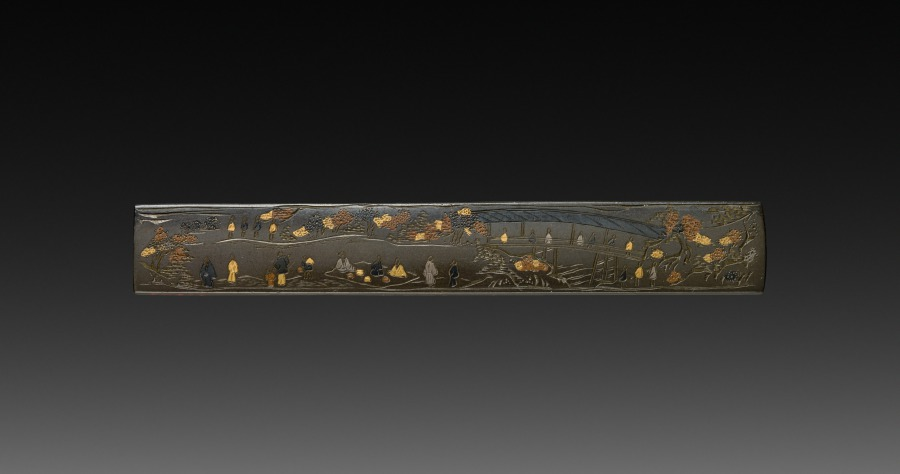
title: Knife Handle (Kozuka)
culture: Japan, Edo period (1615–1868)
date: early to mid-1800s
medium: inlaid bronze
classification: Metalwork